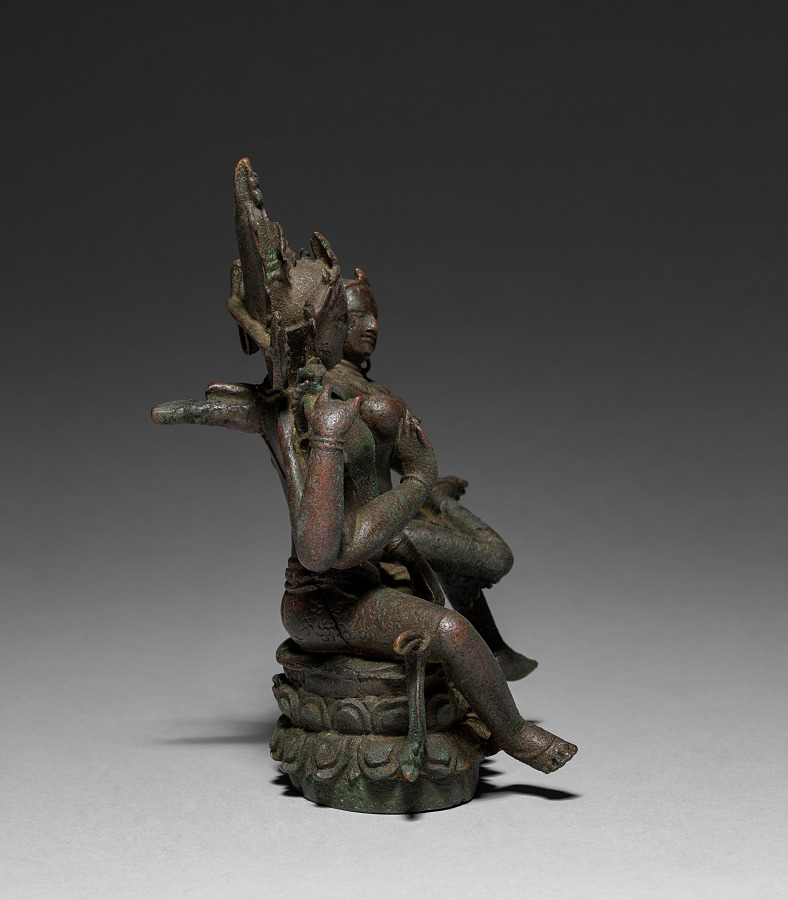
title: Shiva and Parvati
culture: East India, Bengal, Pala period, 9th Century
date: 800s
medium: bronze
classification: Sculpture